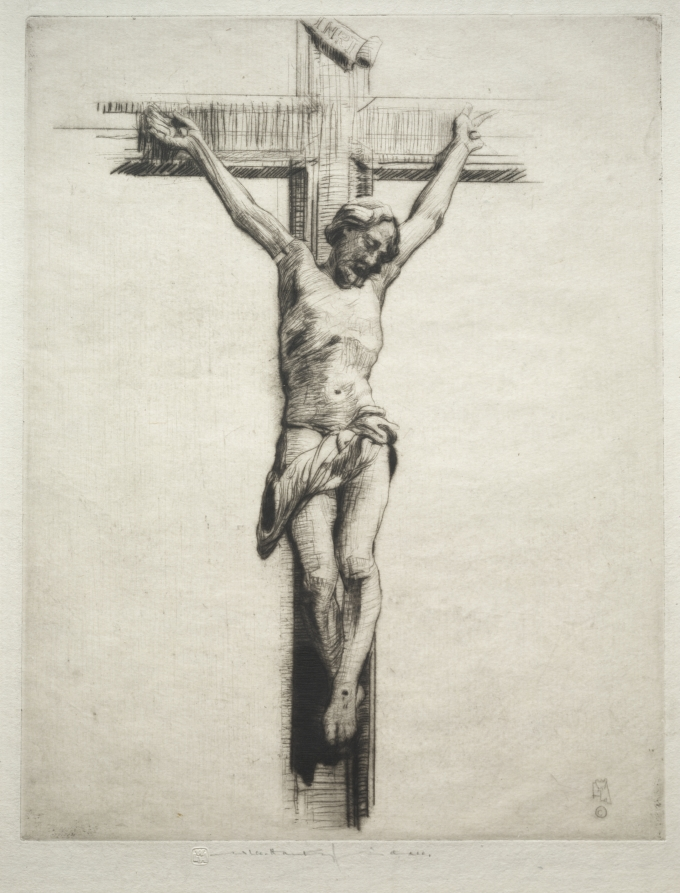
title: The Great Symbol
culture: England, 20th century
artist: William Lee Hankey (British, 1869–1952)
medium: drypoint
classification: Print